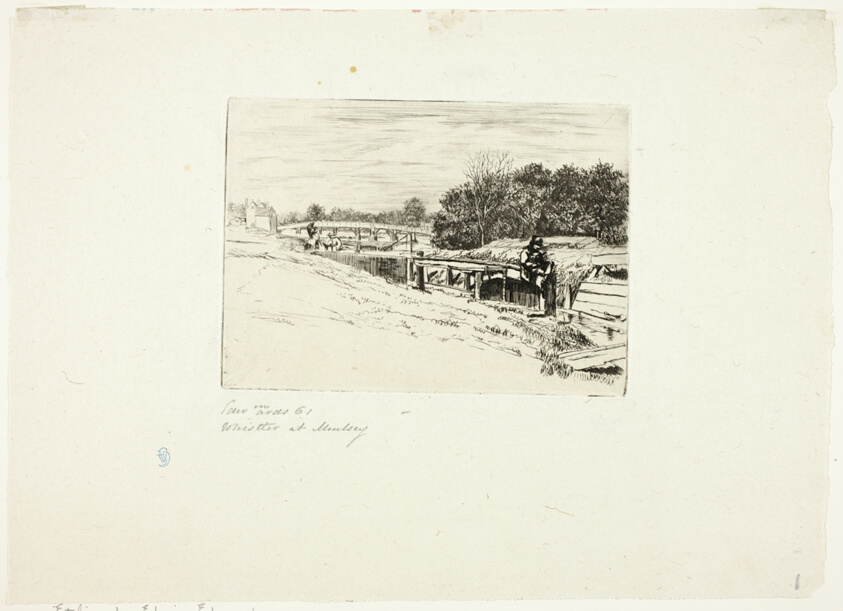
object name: Print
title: Whistler Sketching at Moulsey Lock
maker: Edwin Edwards (English, 1823-1879)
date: 1861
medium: Etching with drypoint in black on cream Japanese paper, laid down on ivory laid paper (chine collé)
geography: England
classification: engraving; print; prints and drawing